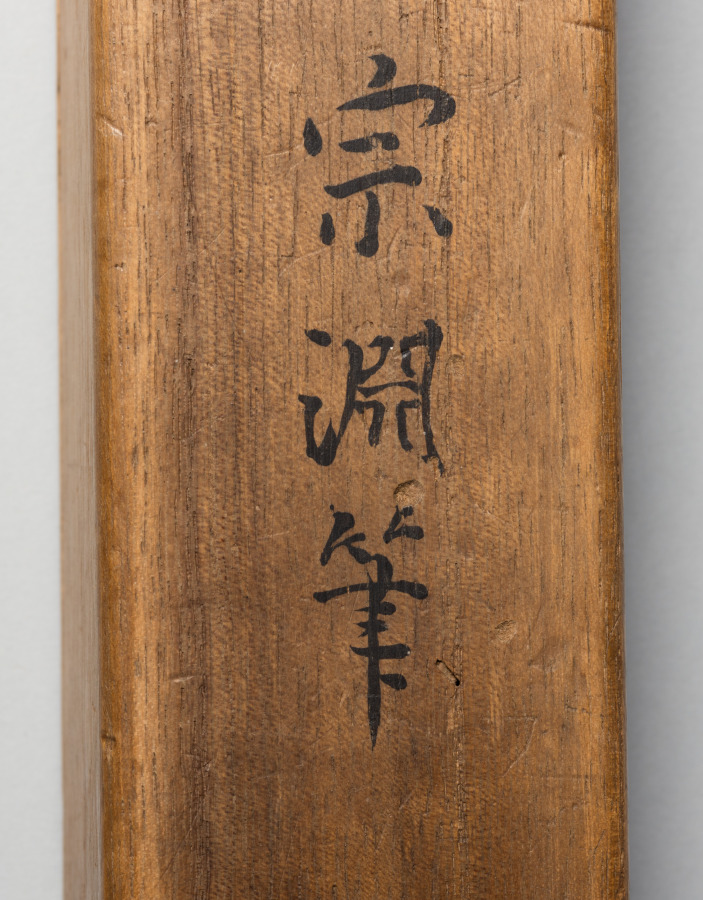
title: Chinese Literatus in an Autumn Landscape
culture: Japan, Muromachi period (1392–1573)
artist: Josui Sōen (Japanese, active c. 1489–1500)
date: late 1400s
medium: hanging scroll; ink on paper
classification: Painting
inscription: Signed: "Sō'en" 宗淵. Sealed: "Josui" 如水; one seal unread.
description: In this painting, Sesshū Tōyō’s disciple Sōen depicts a Chinese scholar-official astride a donkey with his attendant behind. Framing their passage on the right side of the scene are two bare willows, and on the left, geese in flight, the cries of which capture the pair’s attention. These elements suggest that the season is late autumn. Sōen, who famously received Sesshū’s 1495 Splashed-ink Landscape as a certificate of his success as a pupil, studied with the master in Suō, presentday Yamaguchi, after which he returned to his native province in the Kanto region.